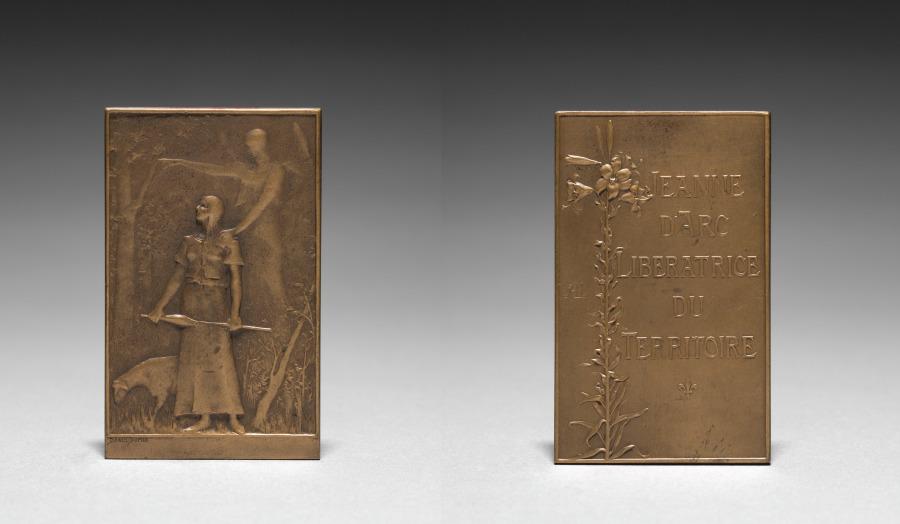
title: Medallion: Jeanne d'Arc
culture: France, 19th century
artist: Daniel Dupuis (French, 1819–1899)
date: c.1900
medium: bronze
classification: Metalwork